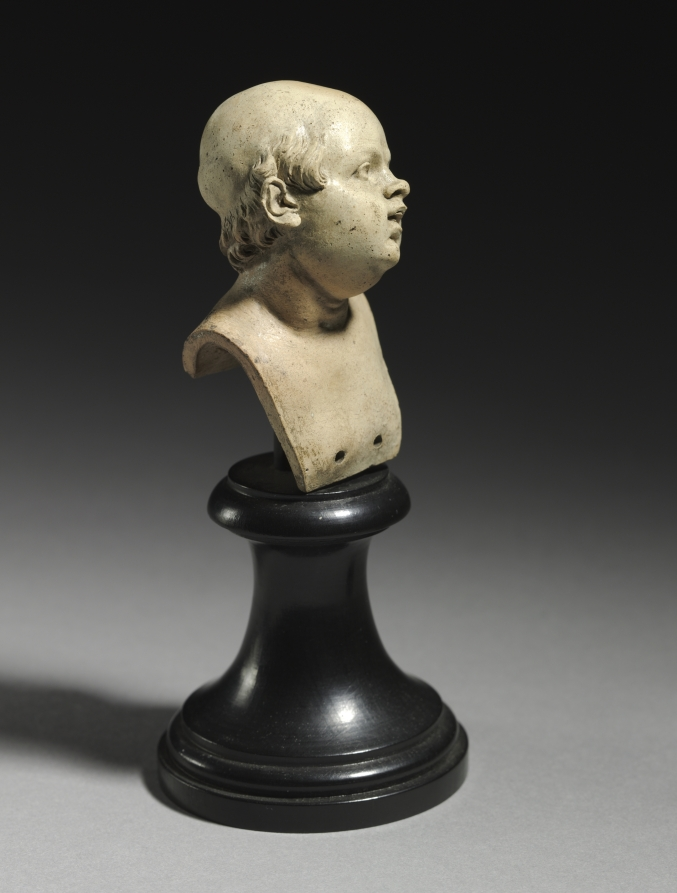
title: Head of a Man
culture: Italy, Naples(?), early 19th Century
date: c. 1800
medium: terracotta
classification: Sculpture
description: Each of these miniscule terracotta busts has allegedly been formed by hand, though the precision of the detailed features implies that they have been cast from a mold. Details such as the meticulously executed facial features and the thin, exact rows of hair on each figure suggest a manufactured method of creation. Furthermore, these figures lack any trace of fingerprints that handmade figures of this time typically bear. Small holes at the base of each bust suggest that the heads were once attached to bodies that may have been used as crèche figurines. The busts were created in Naples where large numbers of nativity scenes were produced around the turn of the nineteenth century. The similarity in size to archetypal terracotta crèche figurines as well as the vast production of nativities in Naples at this time suggest that these busts were created for a nativity scene.